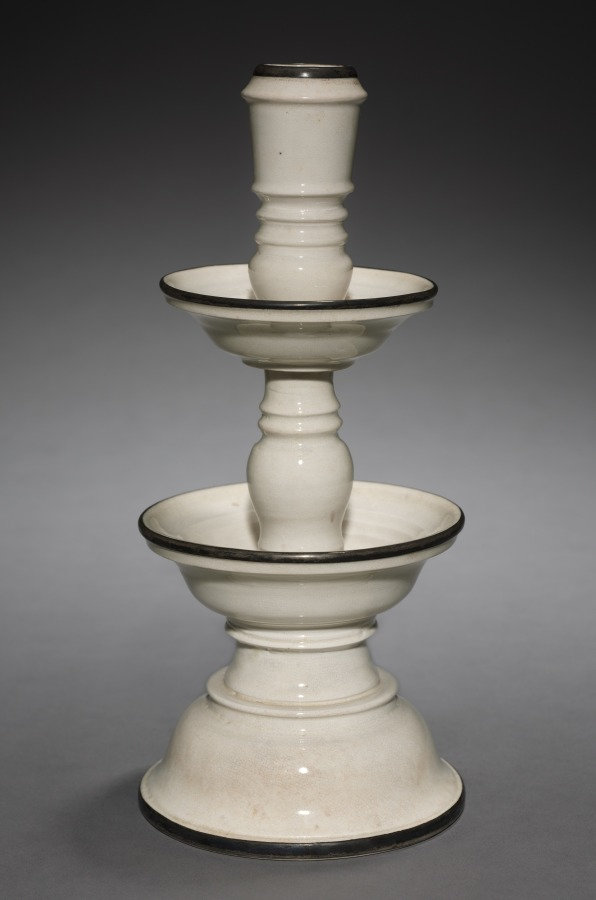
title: Candlestick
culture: China, Ming dynasty (1368–1644)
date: 1600s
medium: glazed porcelain with metal rims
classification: Ceramic